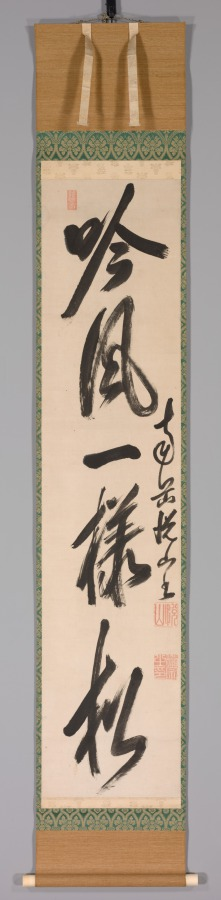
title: Calligraphy in Semi-Cursive Style (xing-caoshu)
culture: China, Qing dynasty (1644-1911)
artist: Yueshan Daozong (Chinese, 1629–1709)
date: c. 1660–1709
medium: hanging scroll; ink on paper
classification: Calligraphy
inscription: 吟風一樣松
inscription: 悅山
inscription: 道宗之印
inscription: Linji zheng zong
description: This bold calligraphy written by Yueshan, an Ōbaku school monk, consists of five characters tentatively translated as “Pine trees singing in the wind.” The line is from Cold Mountain Poems (Hanshan shi). Cold Mountain is the pen name (hao) of the poet monk Han Shan, as well as the name of a place. In one poem Han describes getting lost on the road to Cold Mountain, perhaps an allusion to the search for religious enlightenment.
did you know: The Ōbaku school of Chan (Zen in Japanese) Buddhism was founded in Japan by Chinese monks in the 1600s. The monk Yueshan emigrated from the Chinese province of Fujian to serve as priest and later abbot at Manpukuji, the headquarters of the Ōbaku school in Japan.